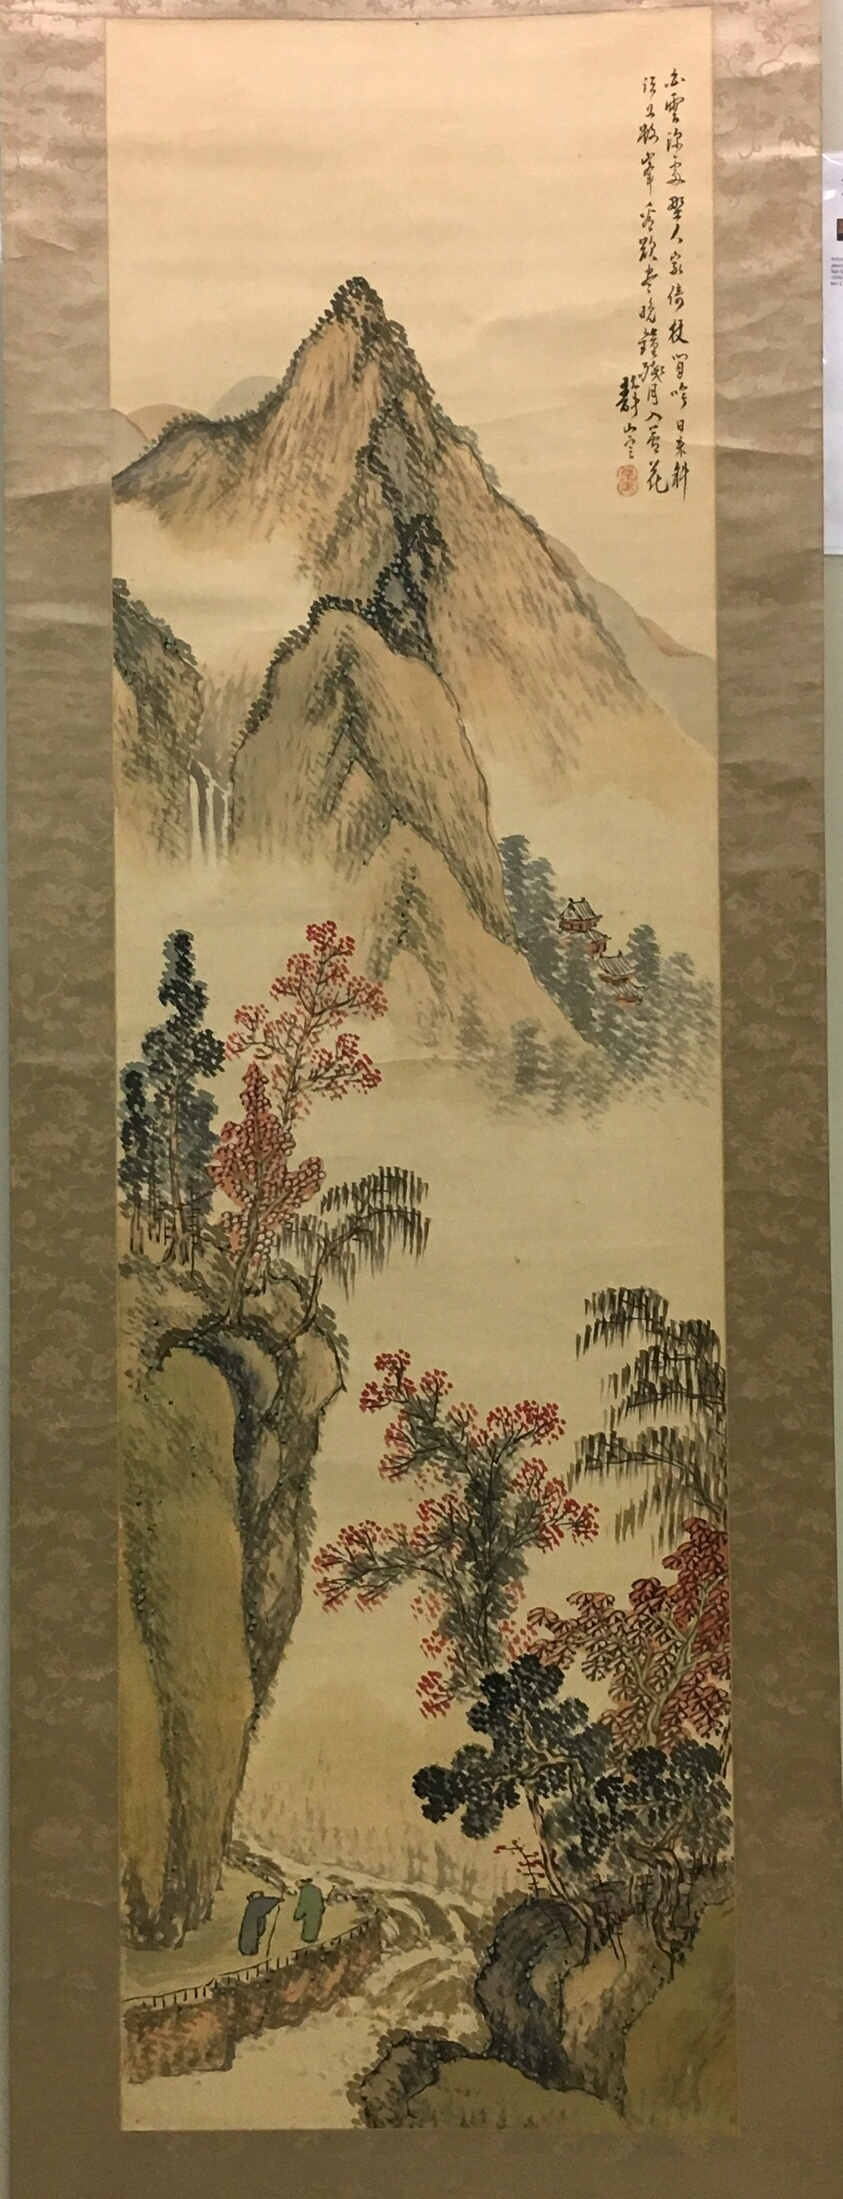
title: Mountainous landscape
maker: Artist unknown (Japanese)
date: 18th century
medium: Hanging scroll; ink and colors on paper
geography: Japan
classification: hanging scroll; painting; asian art